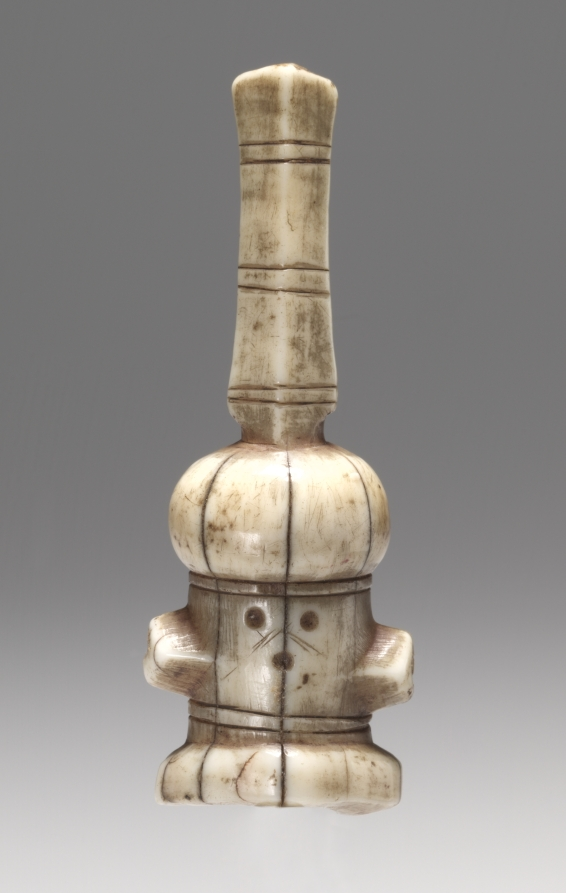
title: Whistle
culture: Central Africa, Democratic Republic of Congo or Angola, Chokwe people, late 19th century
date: late 1800s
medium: Probably hippopotamus ivory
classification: Musical Instrument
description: Carved out of ivory or wood in a variety of shapes, Chokwe whistles often bear miniature, stylized renderings of masks. Cikunza, the "patron saint" of the boys' initiation into manhood, is depicted with a pointed extension imitating the horn of a road antelope, symbolizing the fertility spirit. Typically such whistles were used by men during the hunt to communicate with their co-hunters and to call their dogs. They were either worn attached to a string as a necklace or tied to a spear.